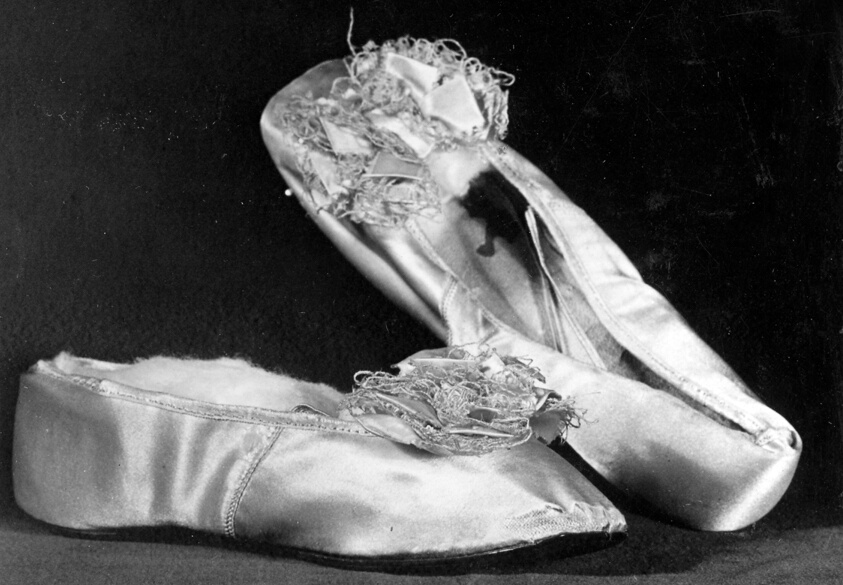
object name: Costume and Accessories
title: Woman's Shoes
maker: England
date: c.1860s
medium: Leather, silk, satin weave with silk ribbons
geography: England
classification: textile; costume accessory - shoe; shoes - misc; costume; dress (garment); clothing